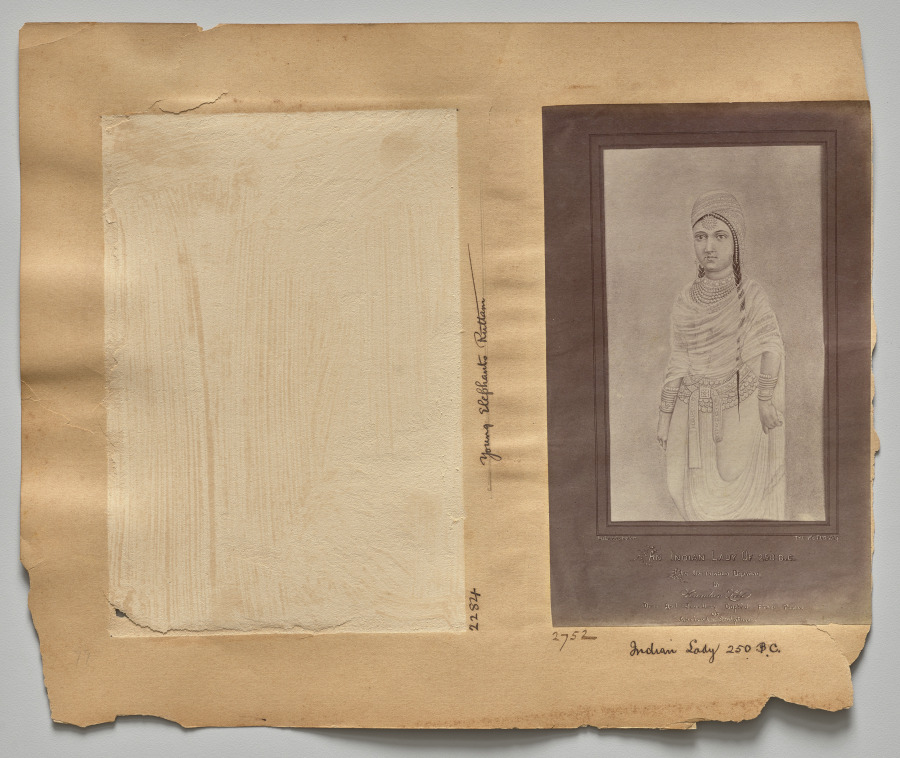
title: Interior of Church, Neemuch (recto, right); Grave of Dr. Falwasser, Neemuch (recto, left); Indian Lady 250 BC (verso, right)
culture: India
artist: Raja Deen Dayal (Indian, 1844–1905)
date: c. 1882–87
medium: albumen print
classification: Photograph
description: These photographs are part of an album, now disassembled, of around 105 photographs taken in India between 1885 and summer 1887 that provide glimpses into the lives of the British colonial elite and royal and upper-class Indians. The museum holds another group of 37 pictures from this album (2016.266), which was probably commissioned by a British civil servant visiting or working in India around 1888 as a personal souvenir of his experiences there.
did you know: Raja Deen Dayal is regarded now, and was considered during his lifetime, to be India’s most important 19th-century photographer.